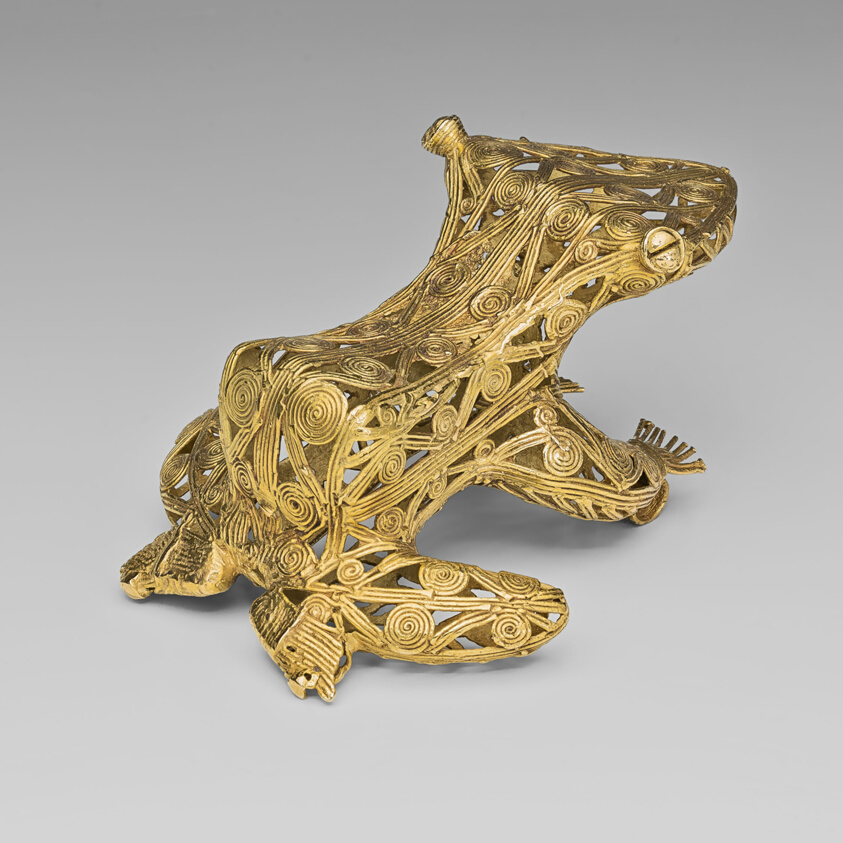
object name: Costume and Accessories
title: Filagree Pendant in the Form of a Frog or Toad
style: coclé, Pre-Columbian, americas, venado beach, lower central america, Arts of the Americas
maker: Coclé (Venado Beach, Coclé province, Panama)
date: 500–1000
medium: Cast gold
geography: Venado Beach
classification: jewelry; pendant (jewelry); metal; art of the americas; costume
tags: frog, animals